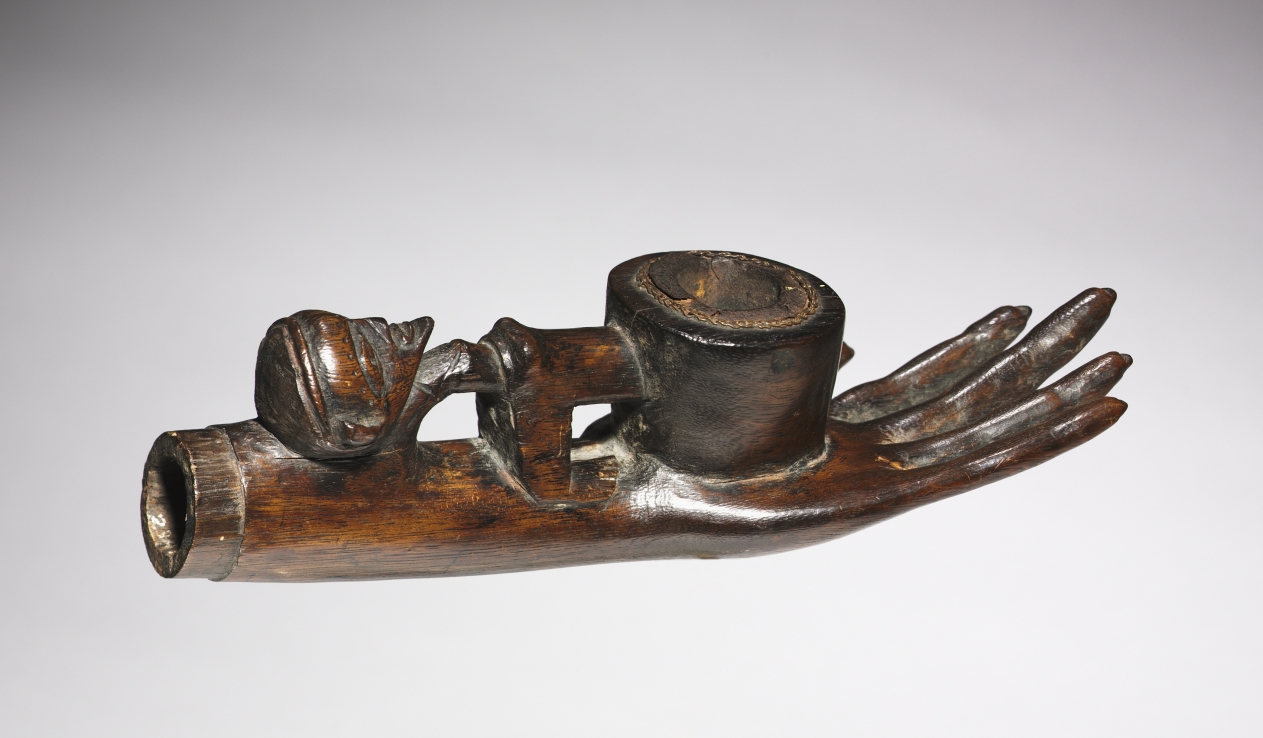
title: Pipe bowl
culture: Africa, Central Africa, Democratic Republic of Congo, Luluwa or Luntu maker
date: early to mid-1900s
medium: Wood, iron, and copper alloy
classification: Implements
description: Tobacco smoking had important social connotations in Central Africa, denoting age, status, and gender. Perhaps the enlarged hand expressed physical and spiritual powers and indicates that this work belonged to a chief. Figuratively carved pipes and snuff mortars constitute important genres of Luluwa decorative arts. As personal objects reflecting the prominence and success of their male and sometimes female owners, they are usually the creative work of virtuoso artists and take a variety of often imaginative shapes.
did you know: The cavity for the tobacco is positioned in the belly of a figure who holds himself up with bent arms on the pipe.